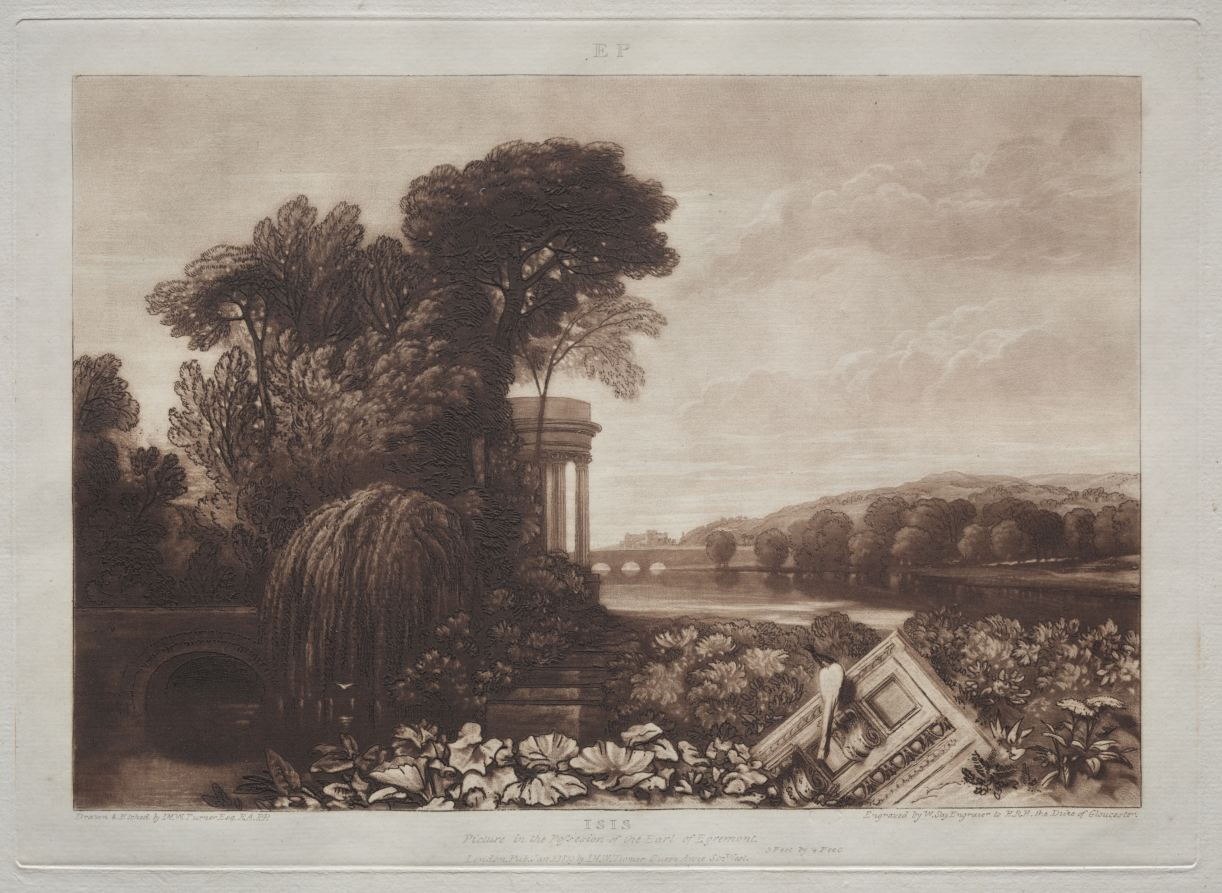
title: Liber Studiorum: Temple of Isis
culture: England, 19th century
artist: Joseph Mallord William Turner (British, 1775–1851)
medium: etching and mezzotint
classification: Print